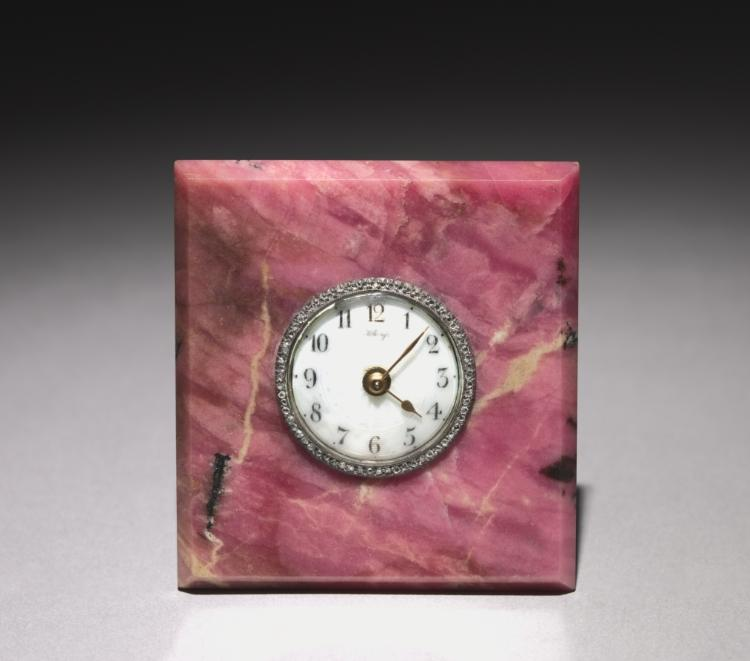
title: Clock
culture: Russia, St. Petersburg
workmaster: Henrik Wigström (Russian, 1862–1923)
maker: House of Fabergé (Russian, 1842–1918)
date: c. 1905–15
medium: rhodonite, silver, enamel, diamonds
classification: Timepiece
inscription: 88, Kokoshnik, lower-case alpha in script [assay mark for St. Petersburg, 1882-99]; H.W. [initials for workmaster Henrik Wigström]; Fabergé (in Cyrillic); 26217 scratched; swan. Fabergé in script on dial of clock; an abbreviation of "weekly wind" engraved in Cyrillic script on back.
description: The use of Russian hardstones in creating precious objects became a hallmark of design from the House of Fabergé. Easily carved, these minerals were sourced largely from the western region surrounding the Ural Mountains. Fabergé's workmasters used colorful stones such as agate, nephrite (jade), lapis lazuli, rock crystal, and rhodonite, seen here in this small desk clock, to create and embellish flower studies, animal figures, and all manner of luxurious accessories. Bright pink rhodonite was among the rarest, and consequently most expensive, specimens used by the House of Fabergé.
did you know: The bright pink color of this small desk clock is a result of manganese, the principle mineral found in rhodonite.